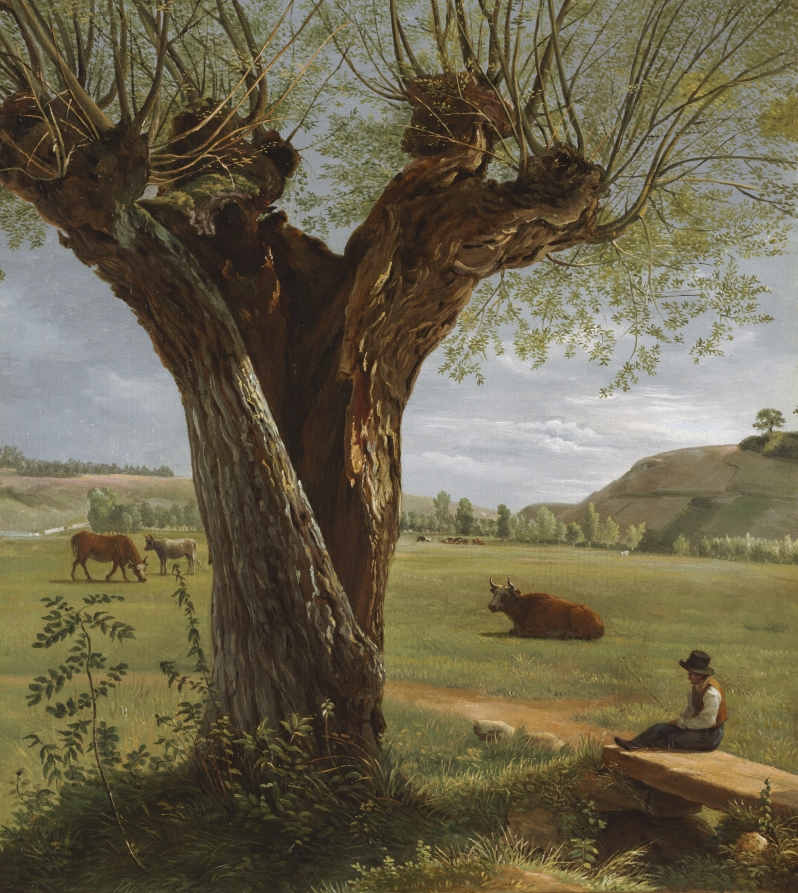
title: Pollard Willow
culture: France, 19th century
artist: Pierre Jean Boquet (French, 1751–1817)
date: after 1804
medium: oil on paper, mounted on canvas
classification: Painting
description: Little is known about Boquet's life, and his artistic origins remain obscure. His style and technique suggest that he received formal training, but where and with whom is unclear. An inscription on a painting attributed to Boquet implies that he spent time in Rome, where he would have seen works by 17th-century French artists such as Claude Lorrain. This may explain the gentle, bucolic atmosphere and the warm, golden light in Pollard Willow, characteristics of which recall the paintings of Lorrain and his contemporaries. The severe pruning or pollarding of trees, especially willows, was a common practice before the Industrial Revolution (about 1750–1850). The procedure allowed the tree to produce large numbers of shoots, which were used in basketry, fence construction, and as fodder for farm animals.